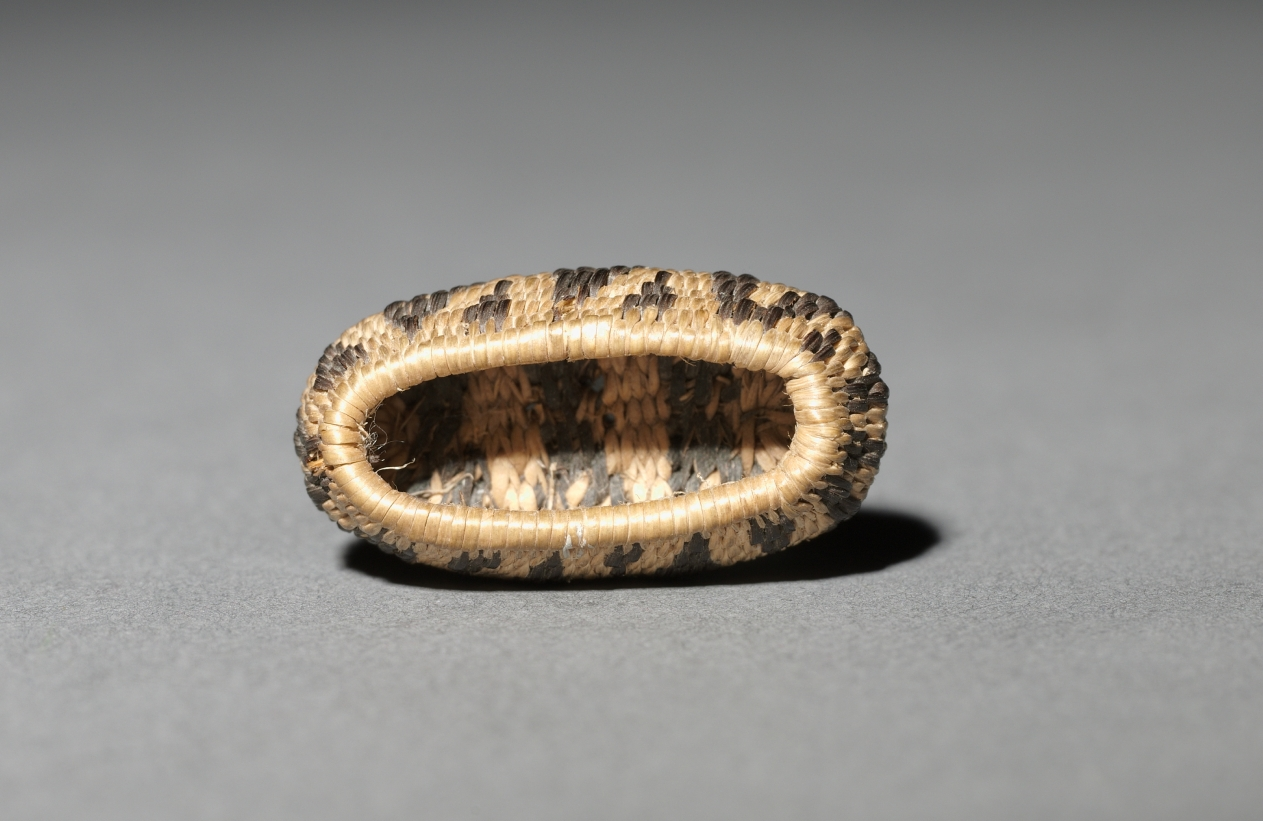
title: Miniature Oval Basket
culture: California, Pomo, late 19th-early 20th century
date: late 1800s-early 1900s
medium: plant materials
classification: Basketry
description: Miniature baskets were made to demonstrate the basket-maker’s virtuoso skill, and these tiny marvels seem to be no exception—the smallest are just a few millimeters wide but still patterned. For such fine work, dexterity was required as much for preparation of materials as for weaving.